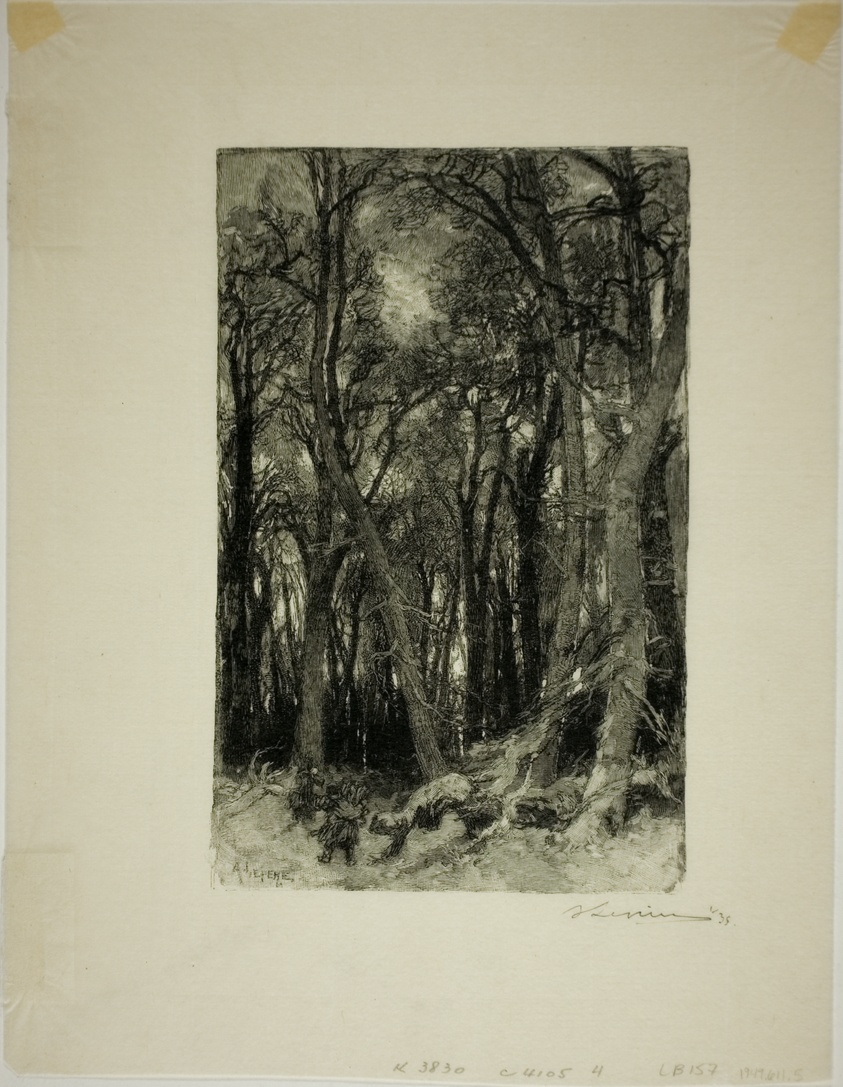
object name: Print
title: Winter: Bas-Bréau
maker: Louis Auguste Lepère (French, 1849-1918); published by A. Desmoulins (French, active c. 1908-1910)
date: 1887, published 1908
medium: Wood engraving in black on cream laid Japanese paper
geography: France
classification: wood engraving; print; prints and drawing